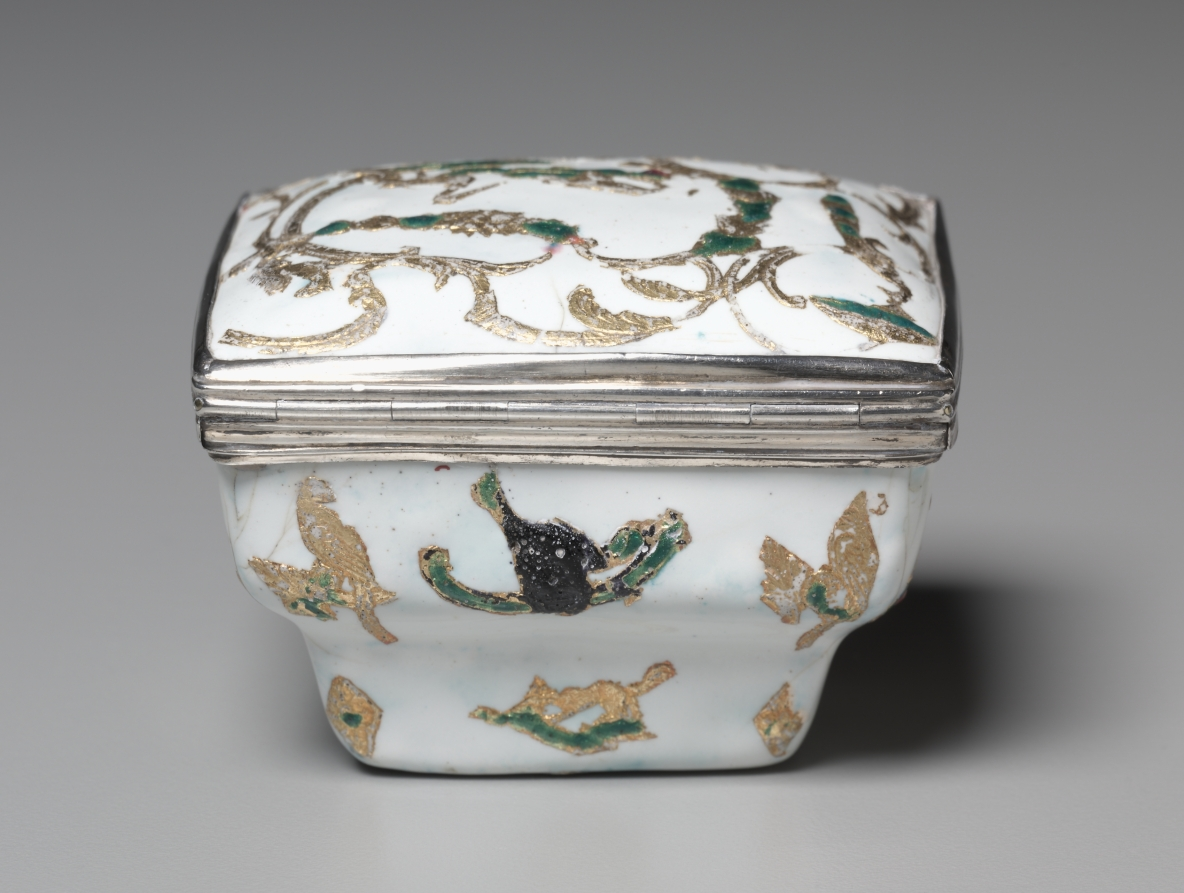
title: Box (Boîte)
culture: possibly France, mid-18th century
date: 1730–40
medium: enamel and gold leaf on copper mounted in silver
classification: Miscellaneous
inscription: [Traces of marks on mounts, too rubbed to be legible. One has previously been identified as possibly a French discharge mark of middle-18th century (Beuque 669 or 687). Maybe the discharge mark for small work of Hubert Louvet, Paris, 1732-38, left side of rim.]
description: Chinoiserie in 18th-century France incorporated imitations of East Asian motifs, designs, and ornaments into European art. These imitations were often distorted by the European imagination and were not accurate representations of the cultures from which they drew inspiration. Motifs typical of chinoiserie can be seen in this box’s floral patterns and repeated representations of pagodas, dragons, and peacocks.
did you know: The depictions of various animals and plants on this box have been covered in a very thin layer of gold called gold leaf.